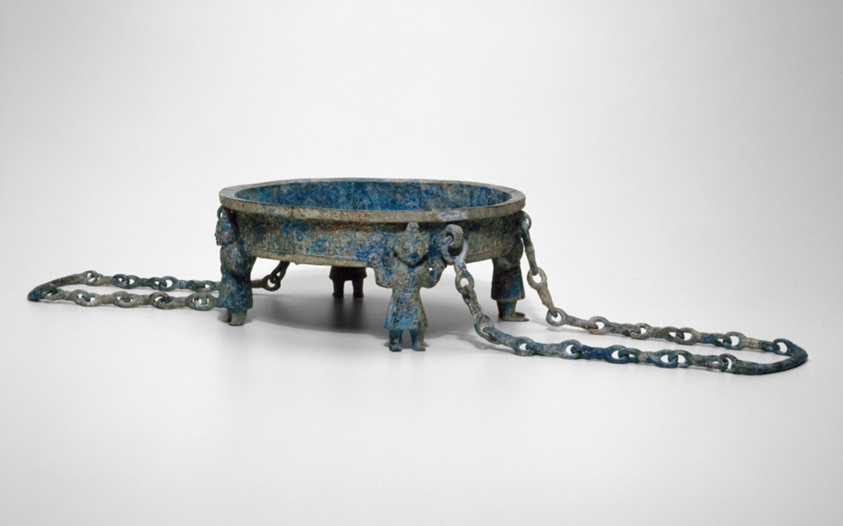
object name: Vessel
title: Basin with Figural Feet (Lu)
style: Chinese (culture or style)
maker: China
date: Eastern Zhou dynasty, Warring States period (771–222 B.C.), 5th/4th century B.C.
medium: Bronze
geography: China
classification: bronze; metalwork; asian art; vessel